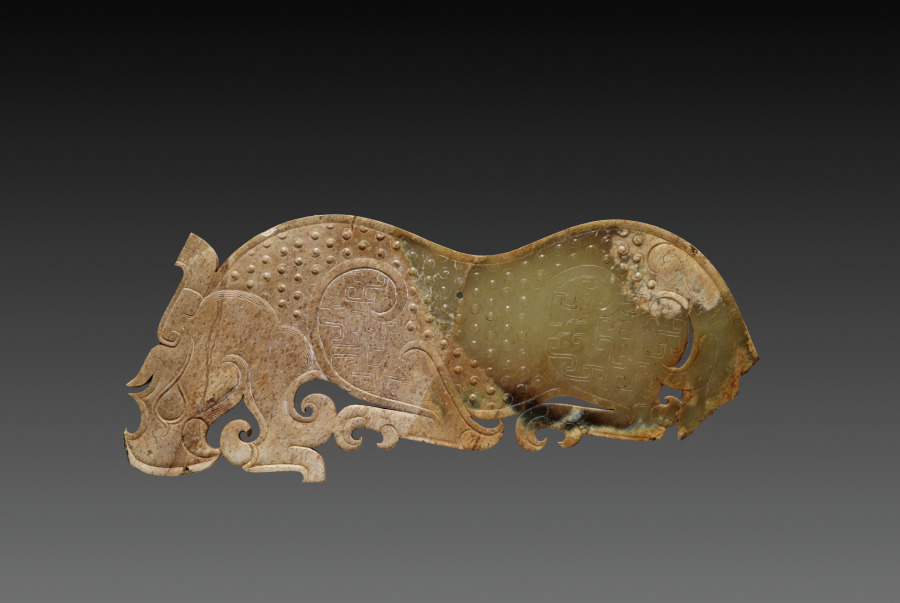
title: Jade Plaque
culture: China, Henan province, Eastern Zhou dynasty (770–256 BCE), Warring States period (475–221 BCE)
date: 475–221 BCE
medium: nephrite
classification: Jade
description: This beautiful pair of late Eastern Zhou openwork jade plaques illustrate a level of creativity and technical achievement that was unequaled before or since. Taking the shape of a pair of fantastic creatures, they are at once tigerlike, rhinolike, and dragonlike. Their strong silhouettes are marked with shallow relief bands, and their subtly swelling embellished surfaces are finished to the same degree on both sides.